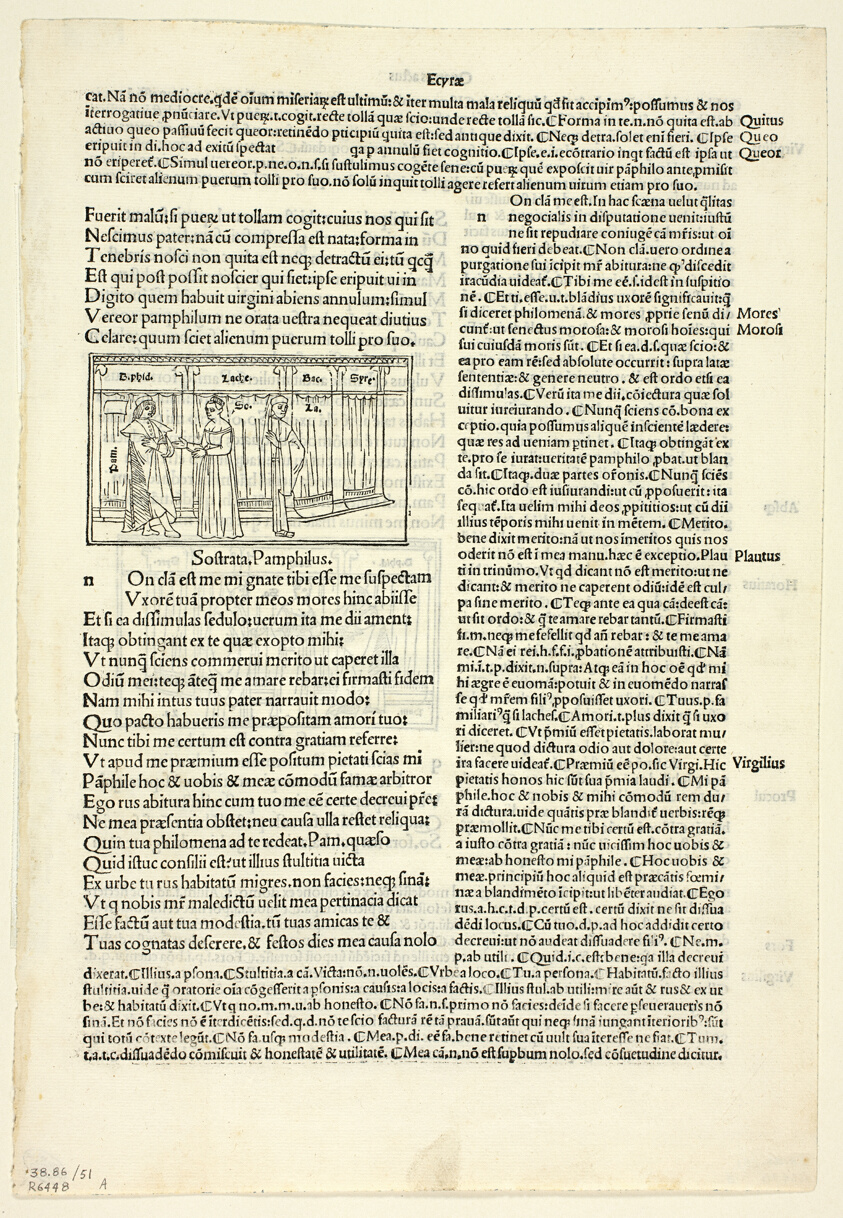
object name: Print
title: Sostrata, Pamphilus (recto) and Laches, Socrates, Pamphilus (verso) from Comoediae (Comedies), Plate 51 from Woodcuts from Books of the 15th Century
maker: Monogrammist ia (Venice, late 15th century); printed and published by Jacobinus Pentius de Leucho (Italian, active 1486-1530); original text by Terence (Publius Terentius Afer) (North African, 195/185–c. 159 B.C.); portfolio text by Wilhelm Ludwig Schreiber (German, 1855–1932)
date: 1497, portfolio assembled 1929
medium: Woodcut and letterpress in black (recto and verso) on cream laid paper, tipped onto cream wove paper mat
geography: Italy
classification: woodcut; print; prints and drawing